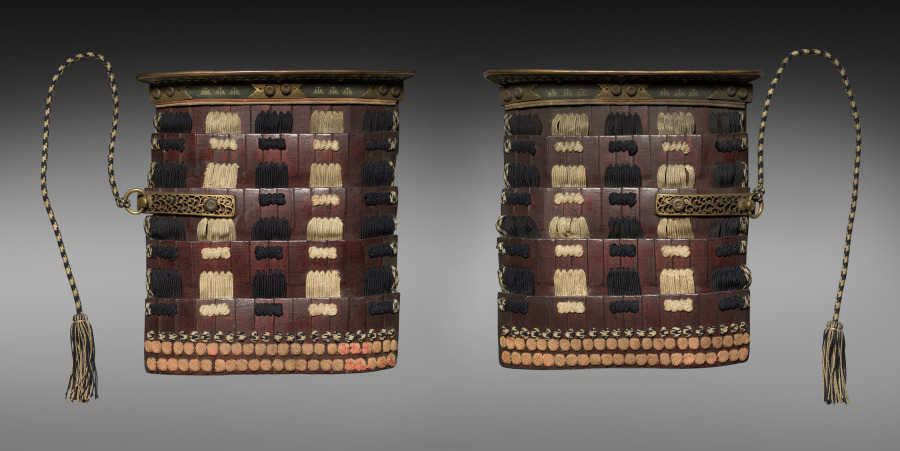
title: Shoulder Guard (Sode)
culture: Japan, Edo period (1615–1868)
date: 1600s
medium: Iron, lacquer, textile (silk)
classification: Arms and Armor